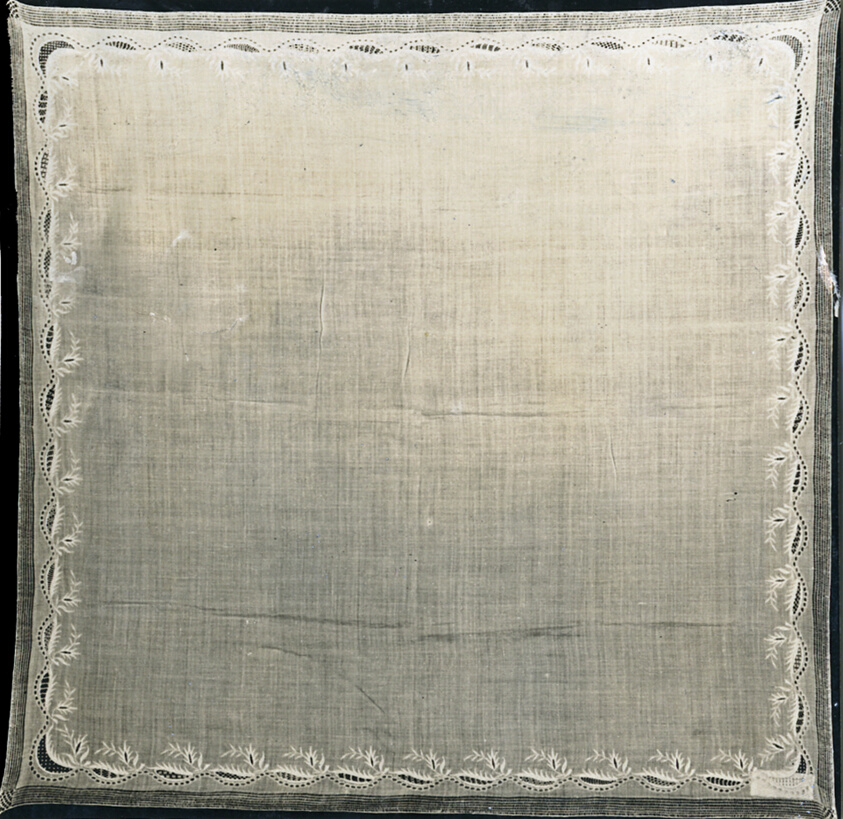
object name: Textile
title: Handkerchief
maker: England or France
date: 1840s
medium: Linen, plain weave; cut work with cotton in darning, herringbone, and needle lace filling stitches; cut and drawn work with cotton in checker filling, hem, and wave filling stitches; embroidered with cotton in buttonhole, eyelet, padded overcast, padded satin and twined double running stitches; French knots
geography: England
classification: textile; needlework (visual works); accessories (object genre); weaving